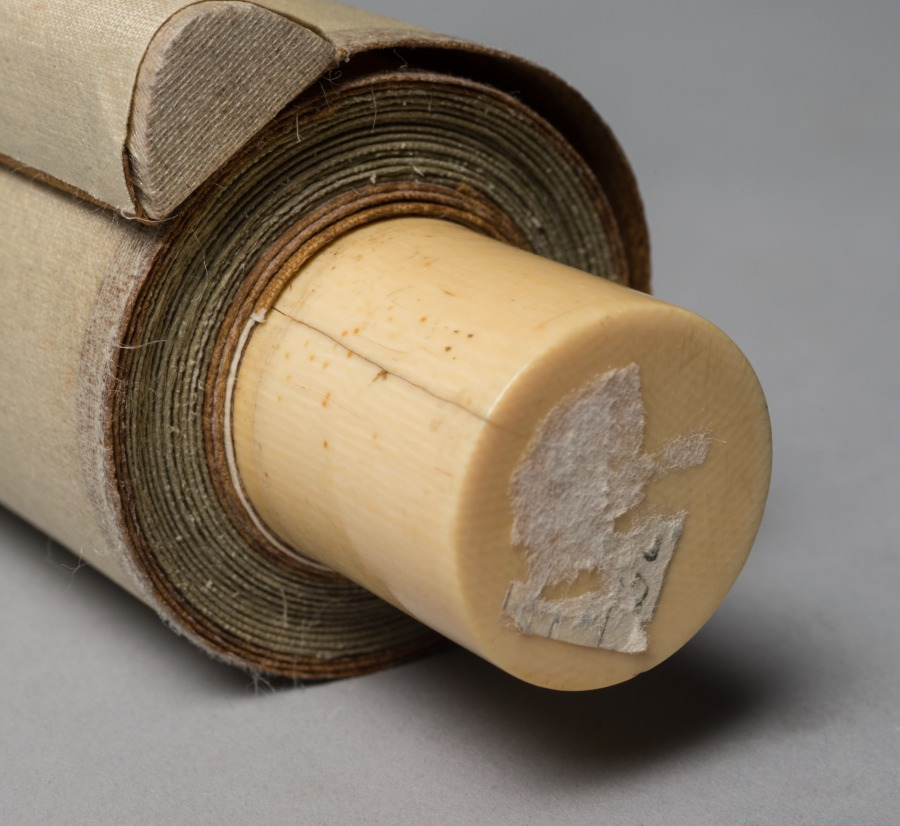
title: Minamoto no Nakakuni Visits Lady Kogō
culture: Japan, Edo period (1615–1868)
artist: Kiyohara Yukinobu (Japanese, 1643–1682)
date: late 1600s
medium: One of a triptych of hanging scrolls; ink and color on silk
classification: Painting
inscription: 款記「清原氏女雪信筆」/「清原女」朱文八角印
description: Kiyohara Yukinobu was one of Japan's earliest and most talented female painters. Kiyohara preferred Japanese-style painting techniques and subjects. Her work depicts the scenery and history of her native land. In addition to the tonalities of ink, she applied a delicate range of colors that help identify the seasons, an important theme in Japanese life and culture.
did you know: This day-lit spring scene is the right part of a triptych presenting an episode from The Tale of the Heike.